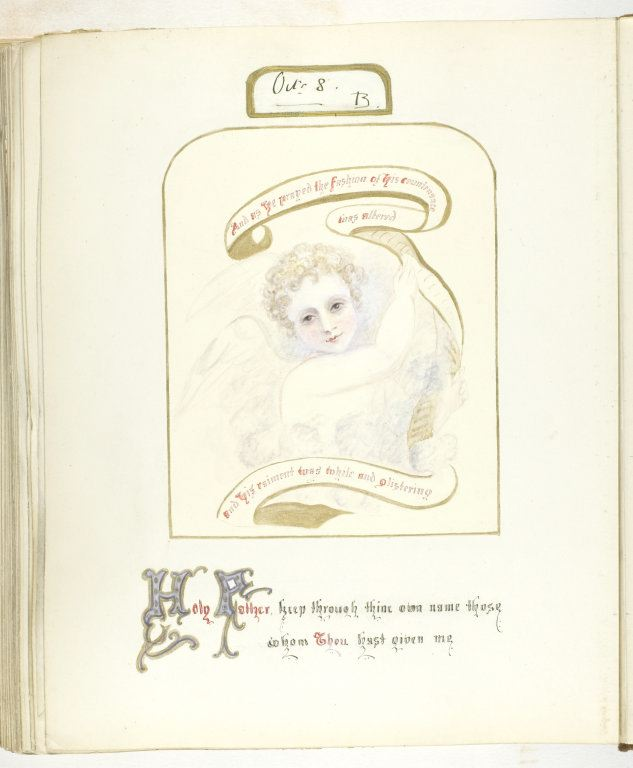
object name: Photograph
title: Untitled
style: 19th century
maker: Georgina Cowper, attributed; English, mid 19th century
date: 1855/68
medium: Ink and watercolor on paper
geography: England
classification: photograph; photography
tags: Collected by Hugh Edwards, Untitled Album 1849-60, Auld Lang Syne